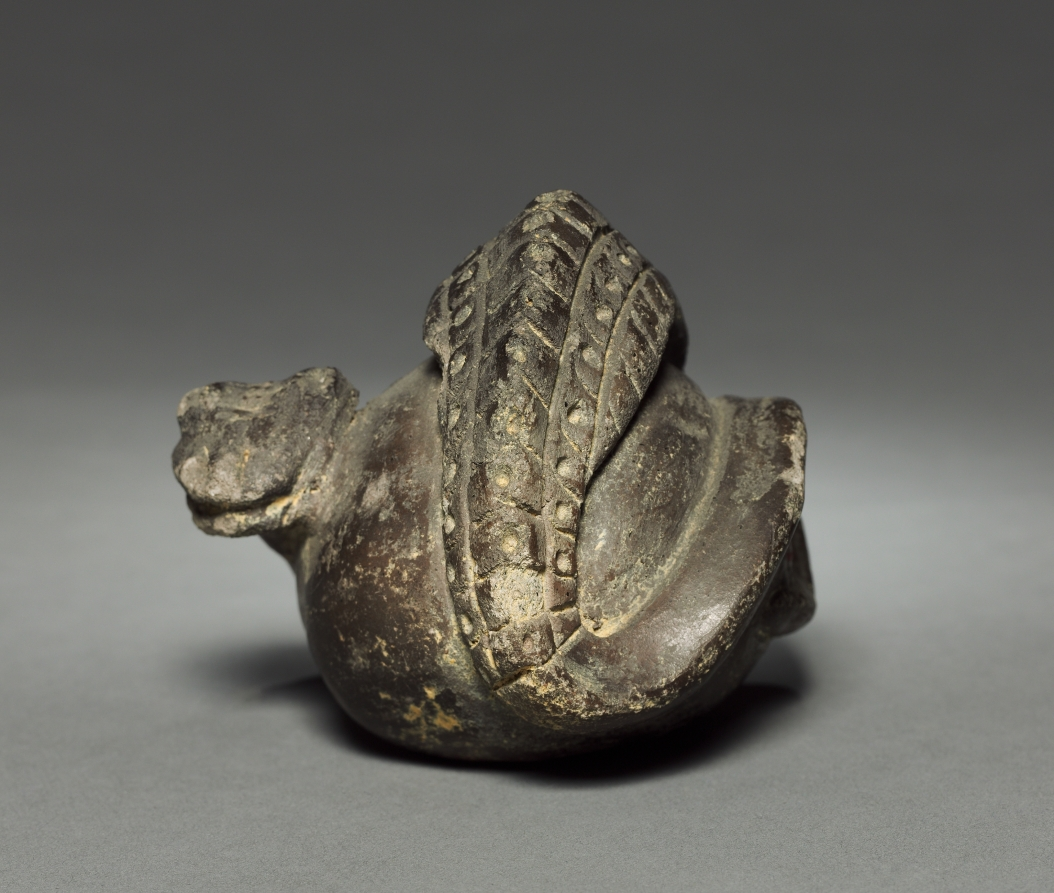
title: Coiled Snake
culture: Colombia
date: before 1921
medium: pottery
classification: Ceramic